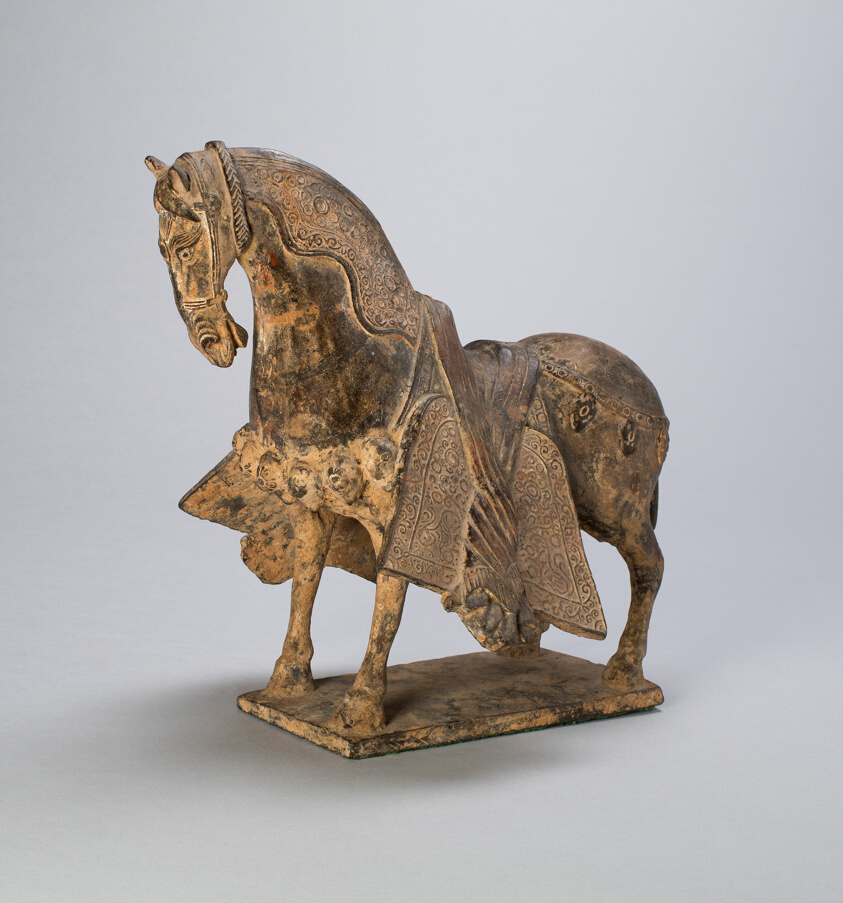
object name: Sculpture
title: Caparisoned Horse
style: Chinese (culture or style)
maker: China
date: Northern Wei dynasty (386–535), early 6th century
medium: Earthenware with traces of polychromy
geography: China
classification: ceramics; asian art; sculpture